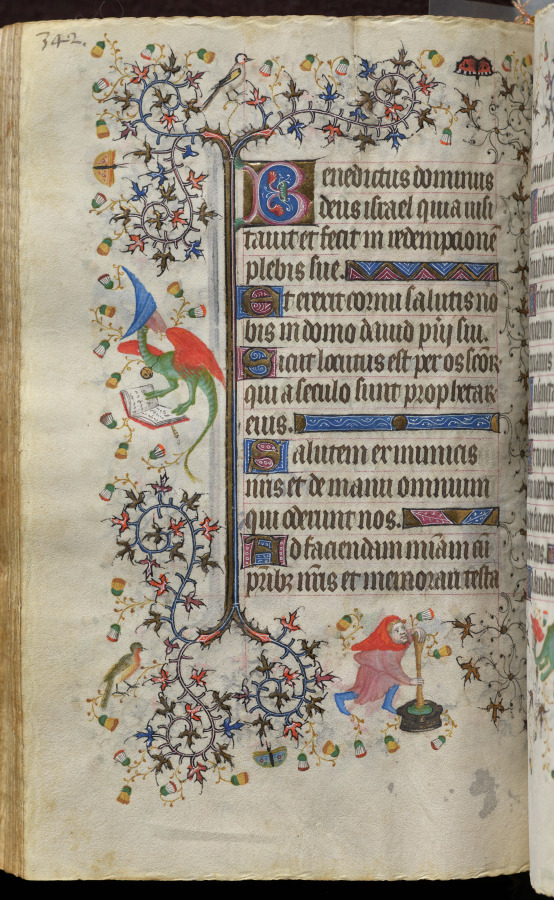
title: Hours of Charles the Noble, King of Navarre (1361-1425): fol. 166v, Text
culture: France, Paris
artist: Master of the Brussels Initials and Associates (French)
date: c. 1405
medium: ink, tempera, and gold on vellum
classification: Bound Volume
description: This precious volume was obviously highly prized by its owner, the French-born King of Navarre, who had his coat of arms painted on no less than twenty folios. Rather than directly commissioning this manuscript from a specific workshop, it seems that Charles the Noble acquired his book of hours -- perhaps ready-made for the luxury market -- while on a trip to Paris in 1404-05. A collaborative effort, six painting styles are evidenced within the pages of this codex, those of two Italians, two Frenchmen, and two Netherlanders. The painter who was responsible for the planning and decoration of the book, and who produced seventeen of the large miniatures, was a Bolognese artist known as the Master of the Brussels Initials. His principal assistant, responsible for most of the borders, was a Florentine who signed his name "Zecho" da Firenze on folio 208 verso.